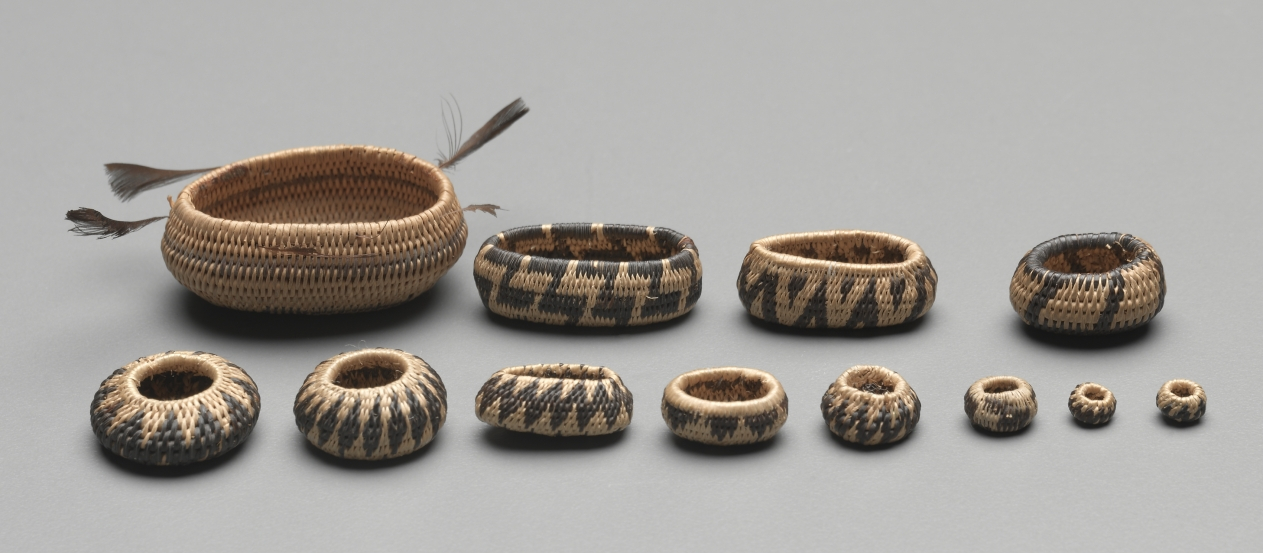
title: Miniature Round Basket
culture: California, Pomo, late 19th-early 20th century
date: late 1800s-early 1900s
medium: plant materials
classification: Basketry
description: Miniature baskets were made to demonstrate the basket-maker’s virtuoso skill, and these tiny marvels seem to be no exception—the smallest are just a few millimeters wide but still patterned. For such fine work, dexterity was required as much for preparation of materials as for weaving.